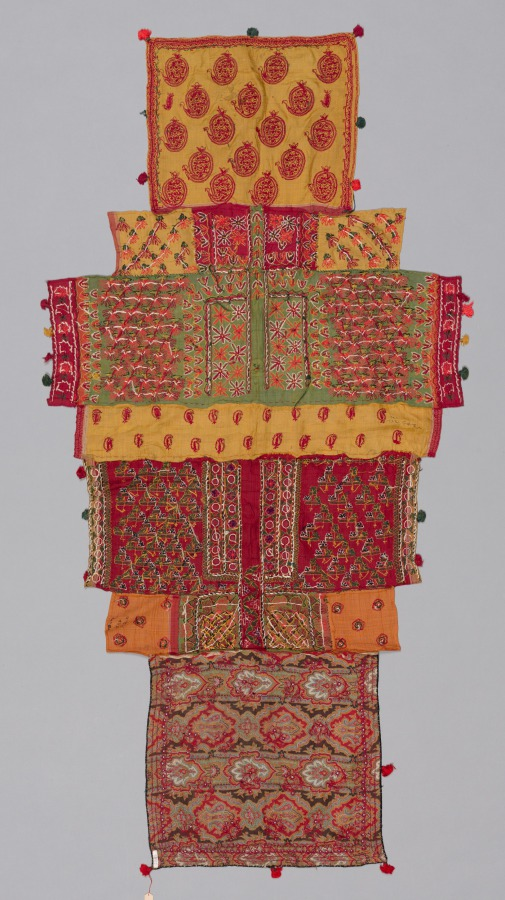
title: Fragments sewn together to form Cover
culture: Western India, Gujarat, Kachchh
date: 1800s–early 1900s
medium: silk thread on silk ground, embroidery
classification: Embroidery